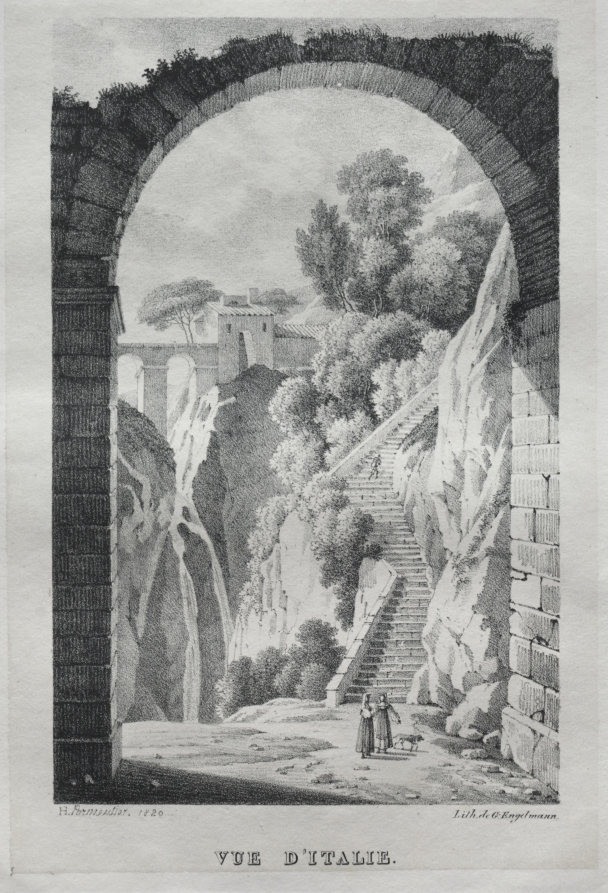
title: Vue d'Italie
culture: France, 19th century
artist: Godefroy Engelmann (French, 1788–1839)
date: 1820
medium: lithograph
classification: Print